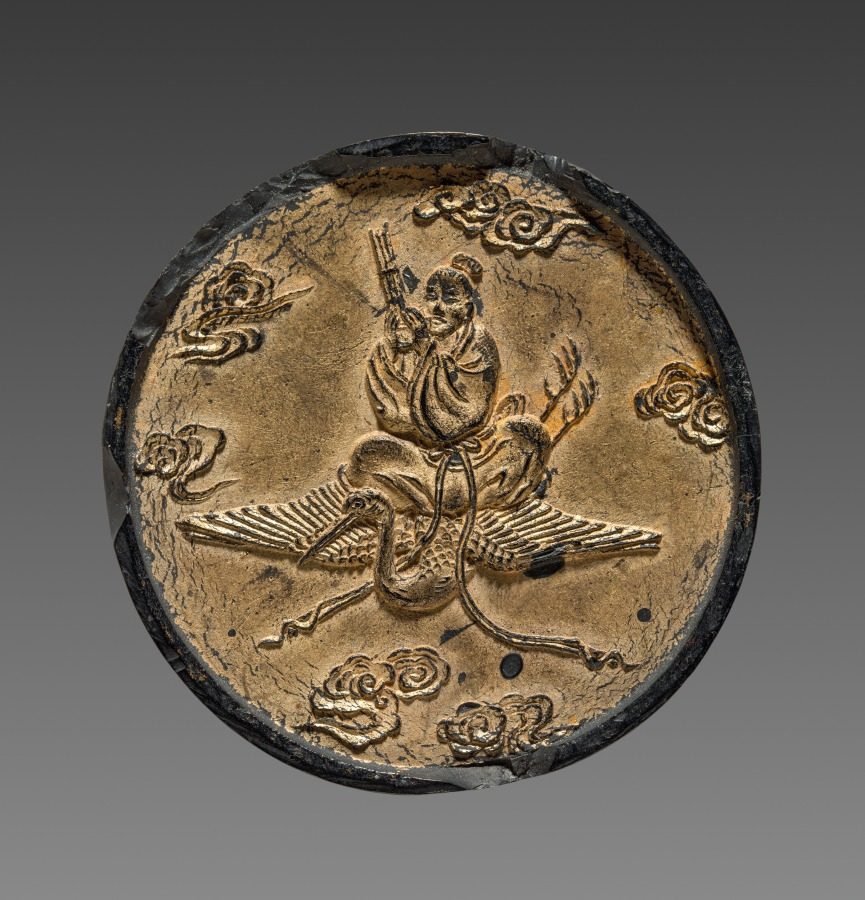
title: Ink Cake with Wang Ziqiao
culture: China, Ming dynasty (1368-1644) - Qing dynasty (1644-1911)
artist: attributed to Fang Yulu (Chinese, active c. 1570–1619)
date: c. 1600s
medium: Molded ink and gold pigment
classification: Miscellaneous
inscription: Mark on base: 于魯監製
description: Ink cakes were dissolved with water to be used for writing and painting. This ink cake depicts the immortal Wang Ziqiao riding a crane and playing a sheng (wind instrument with reeds). Legend says that he was a prince who became a Daoist immortal. The design was likely borrowed from an illustrated Ming dynasty book on Daoist immortals printed in Anhui, the Liexian Quanzhuan. Ink cakes using Fang Yulu’s name, a famous ink maker in Huizhou, Anhui province, may just as well be products of followers who aspired to profit from his fame. His greatest local rival was his former mentor Cheng Dayue (1541–after 1610).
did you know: The front, back, and sides of this ink cake are partially gilded.